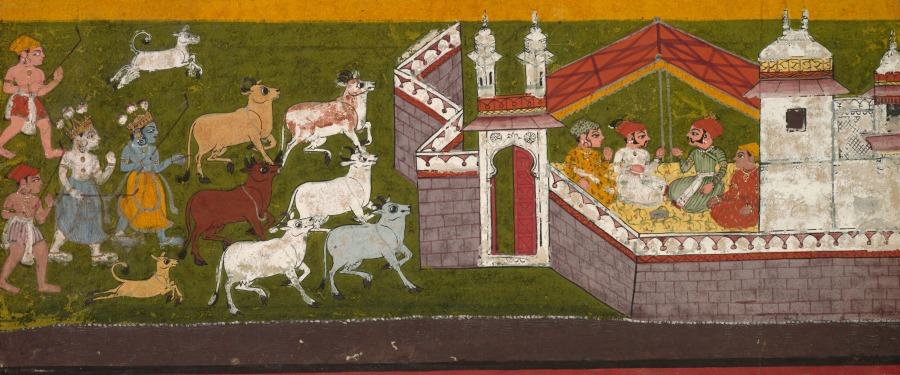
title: Krishna and Balarama Approaching Mathura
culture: India, Rajasthan, Kota, 18th century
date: c. 1740–1750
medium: color on paper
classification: Painting